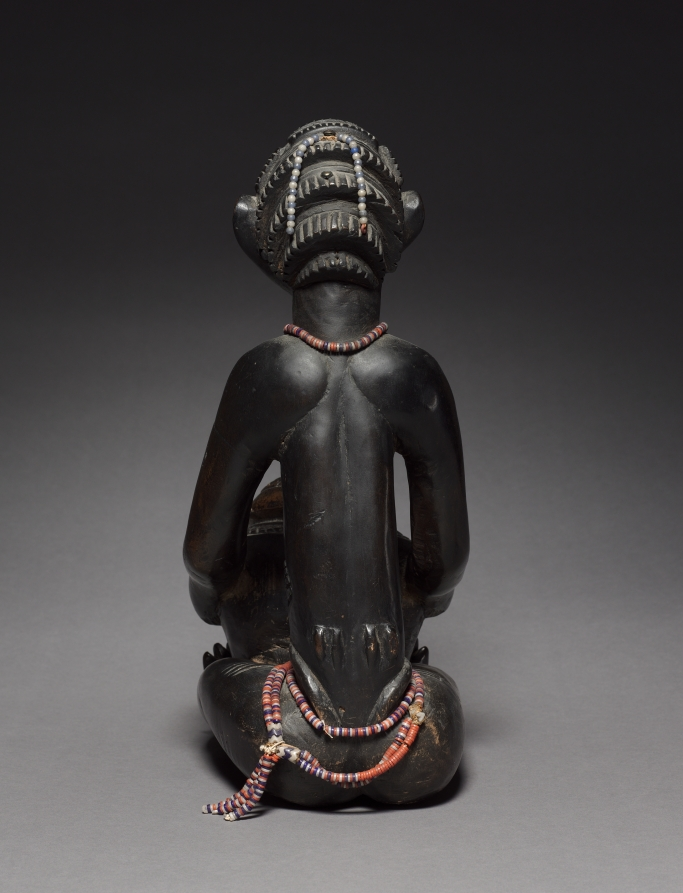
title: Female Bowl-Bearing Figure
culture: Africa, Central Africa, Democratic Republic of Congo, Luba-style carver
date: late 1800s-early 1900s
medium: Wood, glass beads, upholstery studs, plant fiber, and iron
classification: Sculpture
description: In Luba-style art, an object's beauty affects how well it works. While bowl-bearing figures had many possible uses, a royal diviner likely used this well-carved image of a woman carrying a bowl in rituals. Dusty traces of mpemba (white chalk) fleck the shining exterior and the bowl's interior, showing it once held this sacred powder. Diamond-shaped scarification marks at her waist, chest, and back add to her beauty. Her hair is carved into the cascading layered hairstyle worn in the Luba region at the turn of the twentieth century. Strands of imported glass beads encircle her waist and neck, and dangle from her hair. The alternating white and blue beads may symbolize the moon and Mbidi Kiluwe, a culture hero linked to royal practice and smithing. While much Luba-style art depicts women—who are societally important—men created and owned the majority of such works.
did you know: Symbolic of anvils, the round metal tacks decorating the figure's hair "pin" spirits and their secrets within it. They are at the hairline and each of the four hair cascades (the bottommost is now gone).